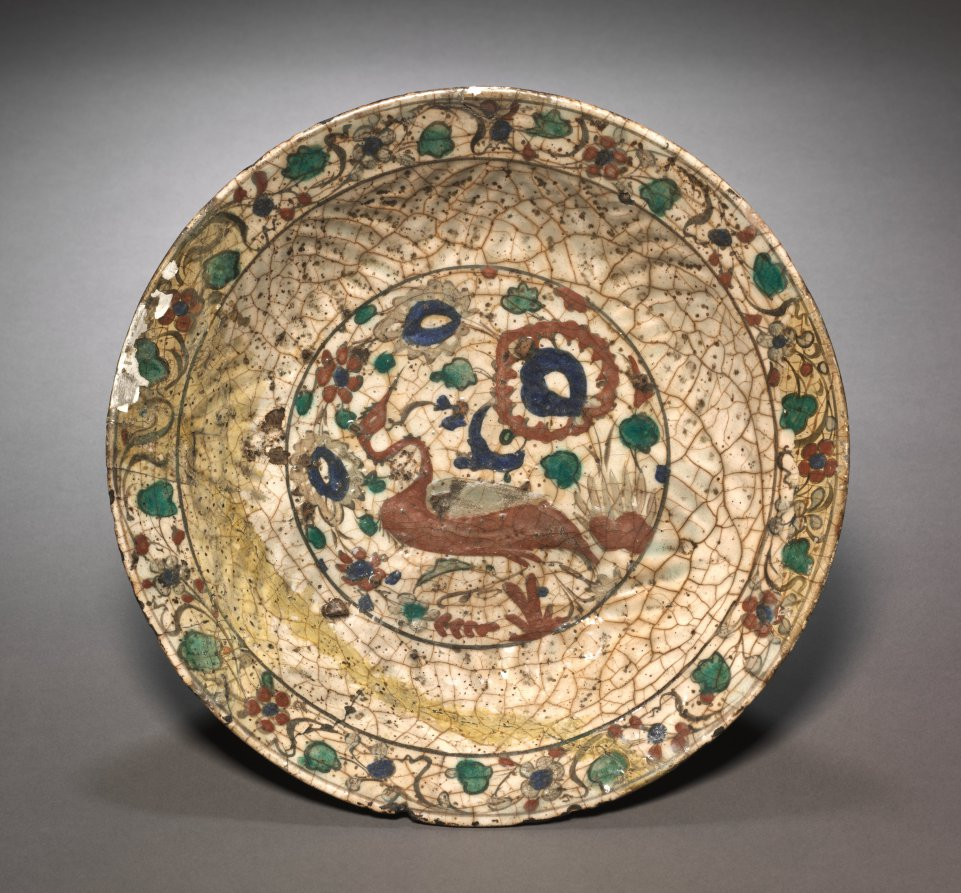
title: Bowl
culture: Iran, Safavid period (1501–1722)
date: early 1600s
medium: Fritware with underglaze design in colored slips, Kubachi ware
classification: Ceramic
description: A long-legged bird, possibly a crane, is surrounded by flowers on the inside of the bowl. The rim is encircled by a band of undulating stems and flowers in red, deep blue, turquoise-green, white, and dull green-gray. The exterior features only the crackle glaze.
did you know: This type of pottery is named after a town in the Caucasus, but most Kubachi wares were likely made in northwestern Iran.